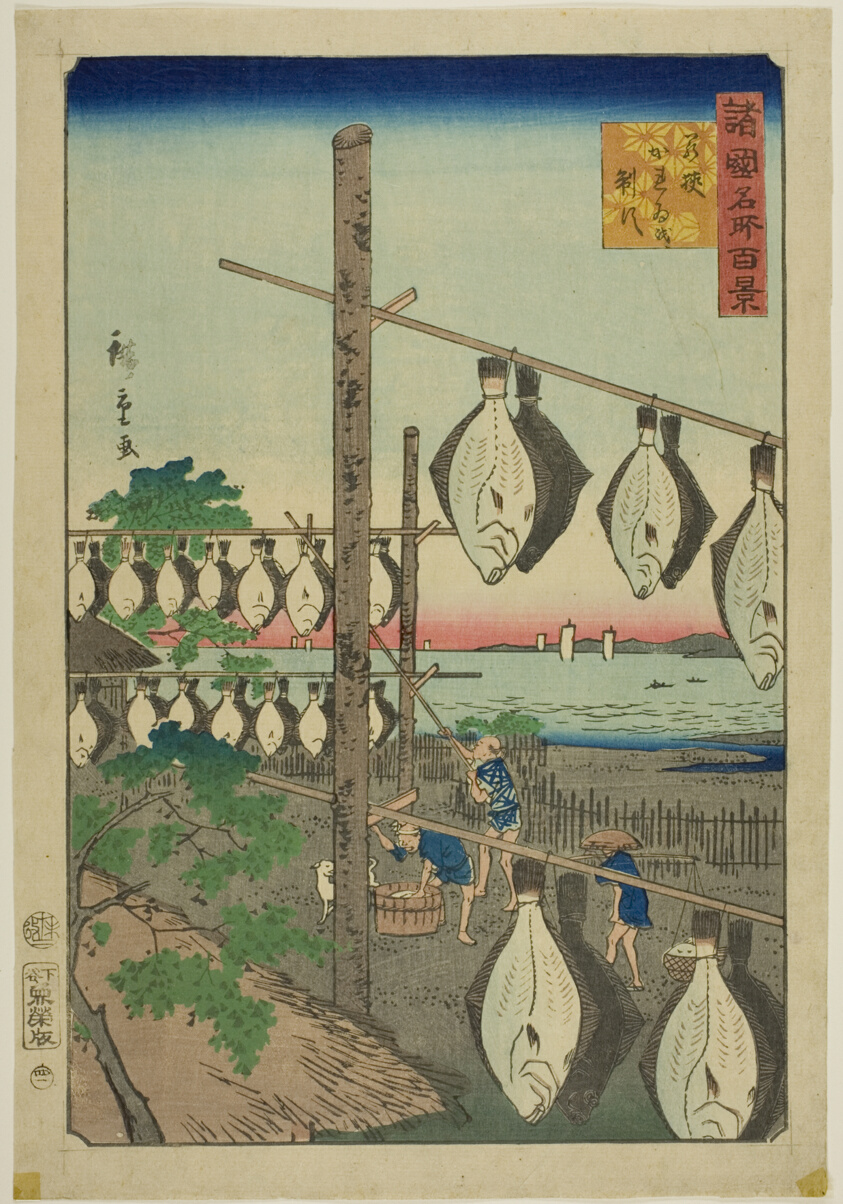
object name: Print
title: Strung-up Flounder, Wakasa Province (Wakasa karei o sasu) from the series “One Hundred Famous Views in the Various Provinces (Shokoku meisho hyakkei)”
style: Japanese (culture or style)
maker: Utagawa Hiroshige II (Shigenobu) (Japanese, 1826–1869)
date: 1859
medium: Color woodblock print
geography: Japan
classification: woodblock print; print